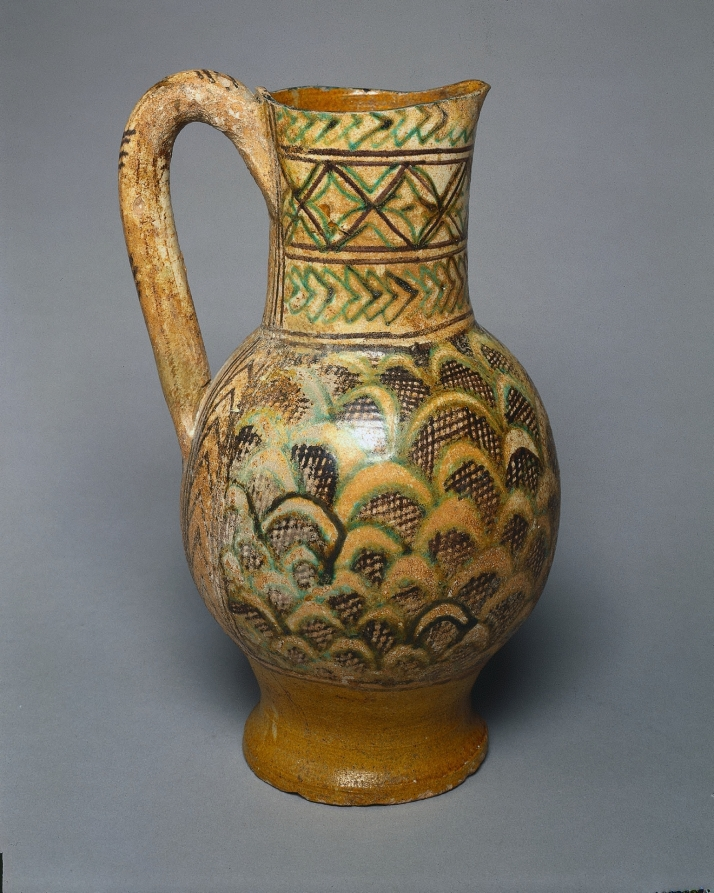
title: Jug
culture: Italy, Siena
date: c. 1350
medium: tin-glazed earthenware (maiolica)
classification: Ceramic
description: The distinctive shape of this jug and its decorative glazes point to a kiln in Siena. The body of the vessel is painted in green and manganese to create an unusual scale pattern. Distinctive regional shapes and styles developed in medieval Italy making it possible to assign vessels such as this to a particular region.